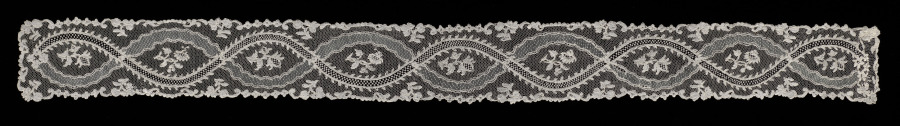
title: Lace Lappet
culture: France, Argentan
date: 1740–60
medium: Linen: needle lace (Point de Argentan)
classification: Lace